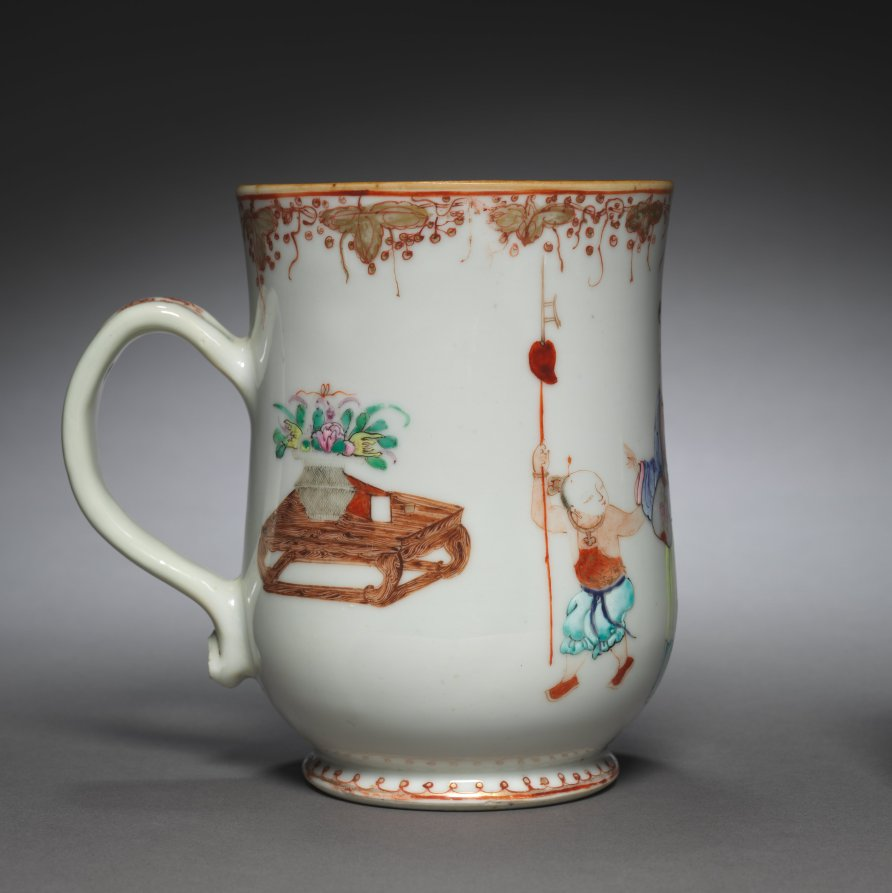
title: Tankard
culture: England, 18th century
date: 1765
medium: ceramic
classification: Ceramic